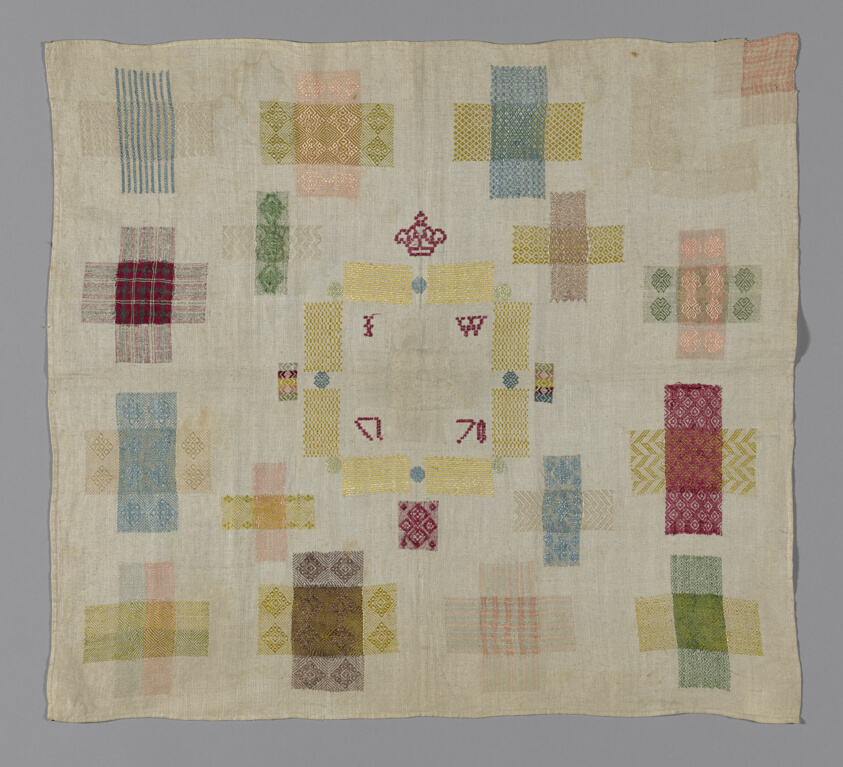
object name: Textile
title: Darning Sampler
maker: England, Germany, or Netherlands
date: 1770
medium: Linen, plain weave; embroidered with silk in darning stitch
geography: England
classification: textile; needlework (visual works); sampler